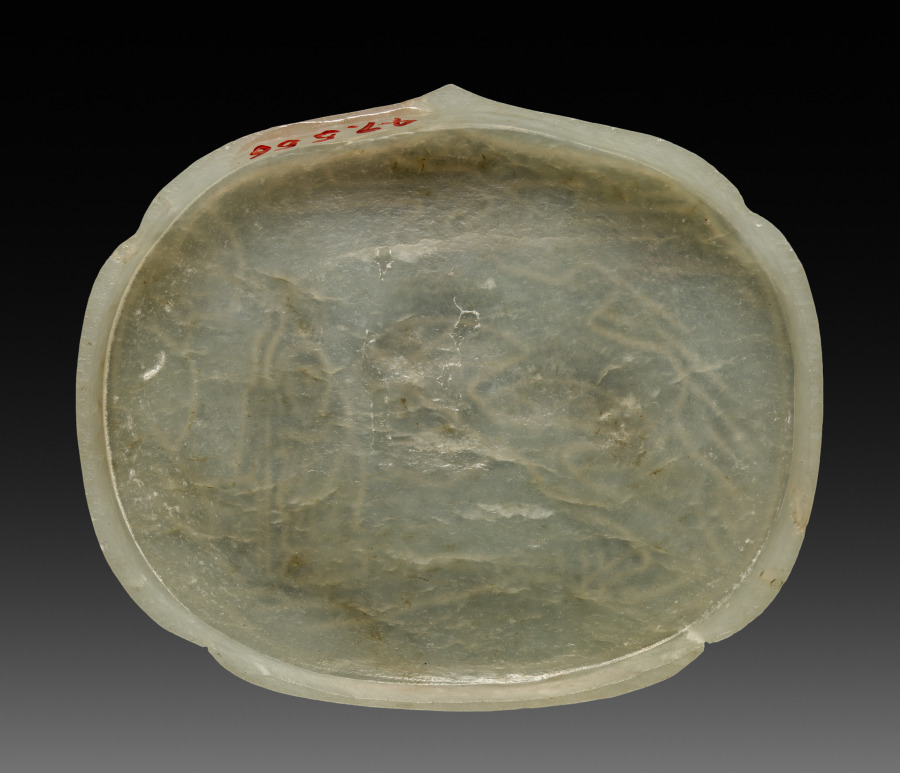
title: Plaque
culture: China, Qing dynasty (1644–1911)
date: 1800s–early 1900s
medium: jade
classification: Jade